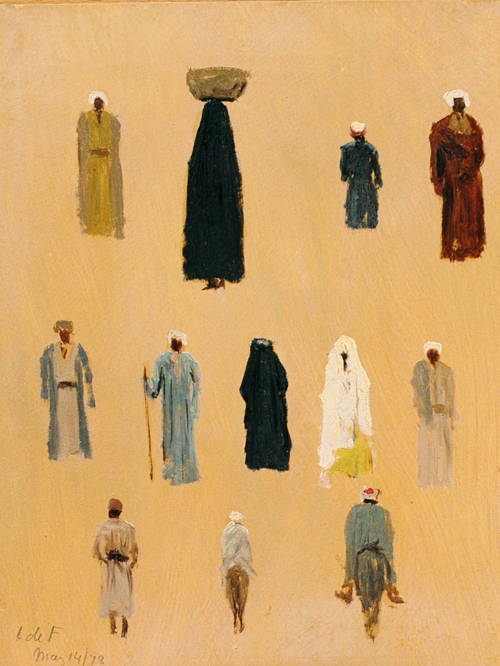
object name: Drawing and Watercolor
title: Middle East Costumes, Egypt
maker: Lockwood de Forest (American, 1850-1932)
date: May 14, 1878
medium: Oil on card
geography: United States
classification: drawings (visual works); prints and drawing